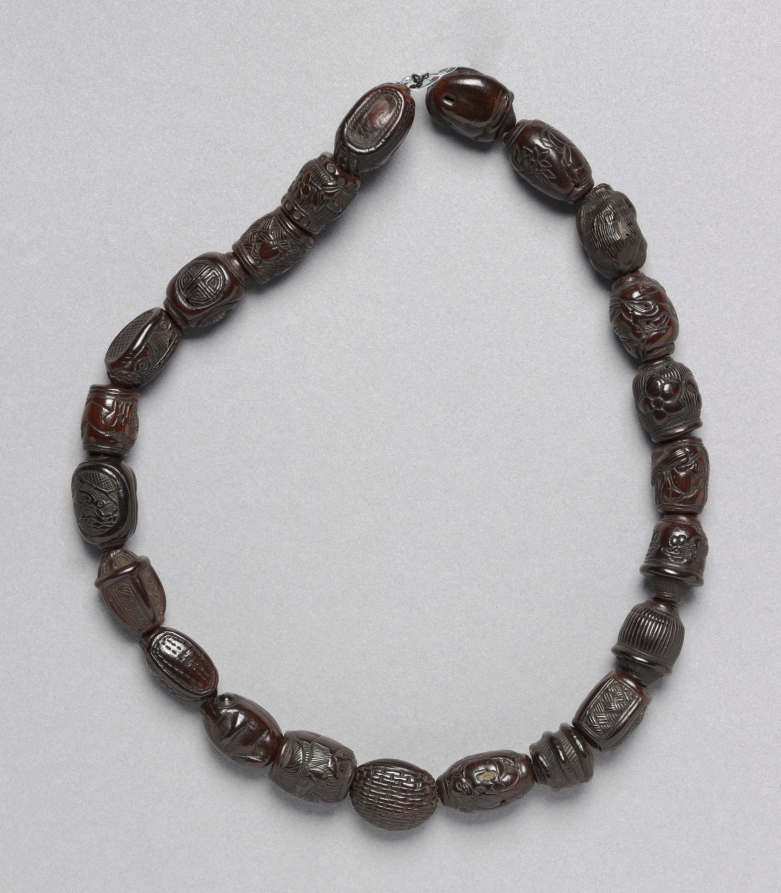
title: String for Men's Hat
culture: Korea, Joseon dynasty (1392–1910)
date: 1800s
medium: Wood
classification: Jewelry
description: Made of either agarwood or red sandalwood, this bead string was once attached to a man's hat called a gat. Each bead bears an inscribed image of fish, birds, frogs, flowers, a boy holding a peach, and some characters of auspicious meanings such as longevity and good fortune.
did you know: This bead string was attached to men's hats called a gat during the Joseon period.